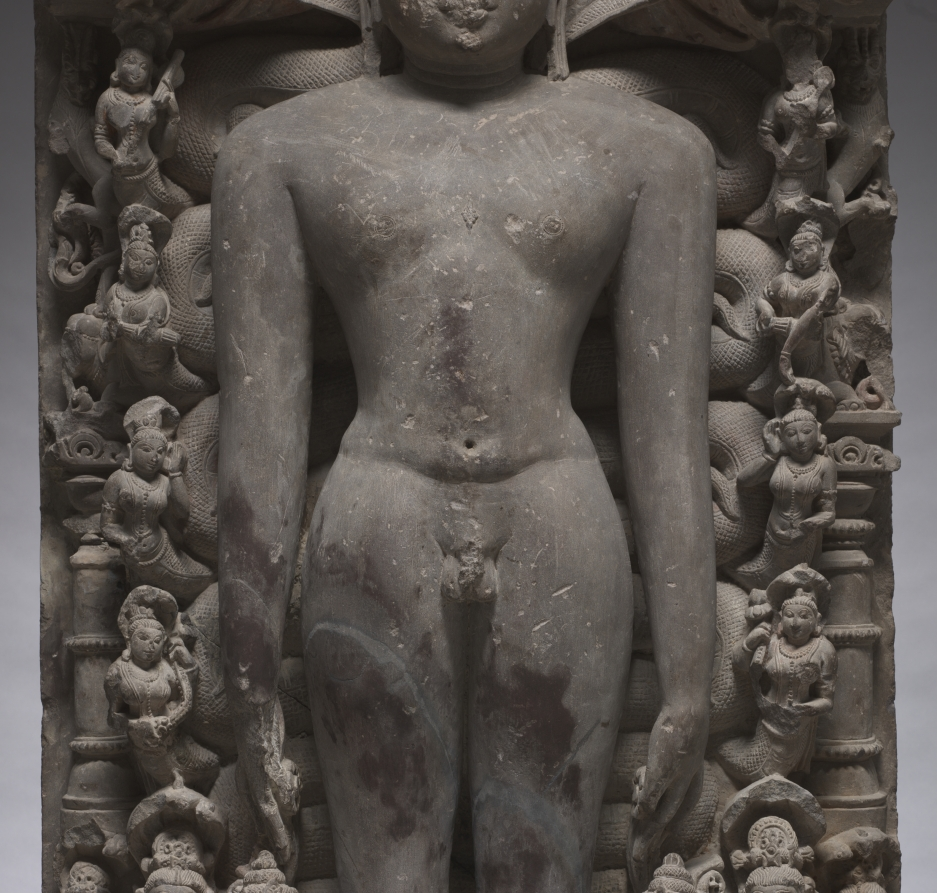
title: Parshva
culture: Central India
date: 800s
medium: sandstone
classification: Sculpture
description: Parshva is the 23rd of the 24 Jinas who achieved liberation. He is the only one who is depicted with a serpent. This sculpture was made for followers of the branch of Jainism called Digambara, who enforce the regulations of total nudity among those actively seeking liberation. The only adornment of his figure is the auspicious symbol on his chest and the wheels of righteousness on his palms. The stark form of thenude body standing in a posture of meditation is masterfully set off from the array of gods and serpent divinities who venerate him. He stands with his feet on a lotus pedestal, but his hierarchically tall form reaches to the heavens, where gods fly to honor him with flower garlands. Three umbrellas over his head indicate his status as a liberated being worthy of worship.